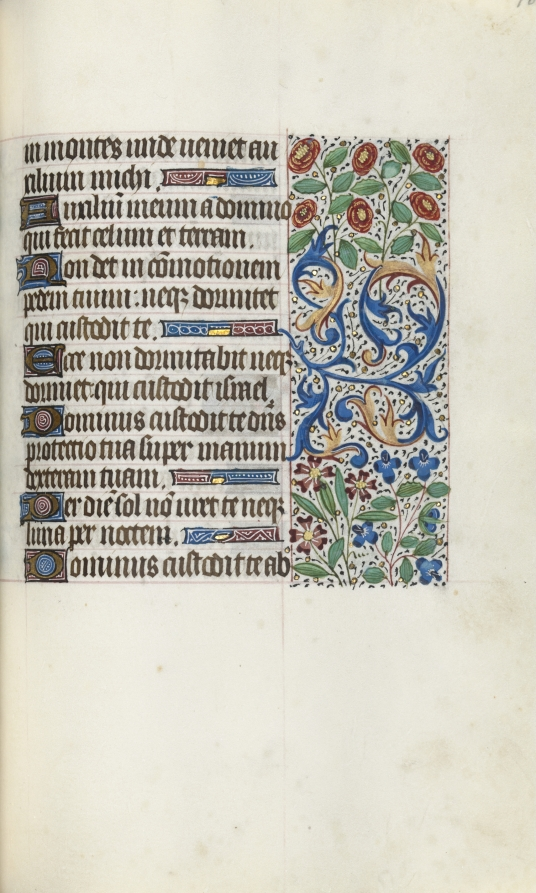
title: Book of Hours (Use of Rouen): fol. 105r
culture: France, Rouen, 15th century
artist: Master of the Geneva Latini (French, active Rouen, 1460–80)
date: c. 1470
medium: ink, tempera, and gold on vellum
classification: Bound Volume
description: In the late 1400s and early 1500s Rouen was an established and important center of book production. The city’s cathedral had a wealthy chapter that spent large sums of money to commission books and to maintain its extensive library. The stationers and booksellers would have likely been concentrated in or near the cathedral precinct. This artist, named after a manuscript now in Geneva, was Rouen’s principal illuminator during the second half of the 1400s.